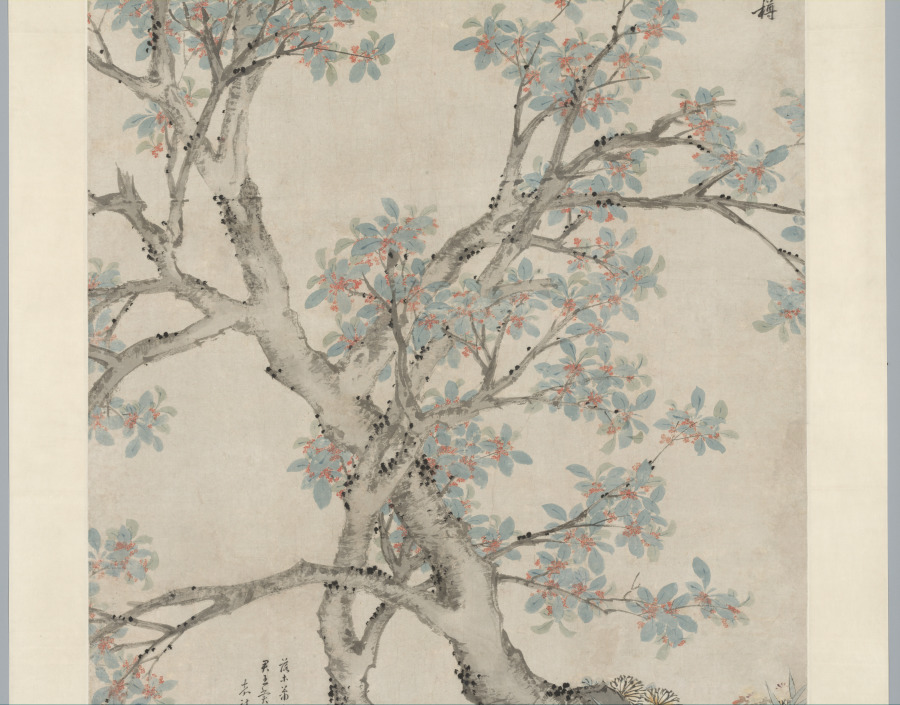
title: Yellow Chrysanthemums and Red Osmanthus in the Style of Wang Yuan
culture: China, Ming dynasty (1368–1644)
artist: Shen Zhou (Chinese, 1427–1509)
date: 1468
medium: hanging scroll, ink on paper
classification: Painting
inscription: Artist's inscription, signature, and 2 seals at upper right: Beneath the fence yellow [chrysanthemum] flowers brave the rain to blossom;/ Still others lean on the red osmanthus tree and dazzle the deep green moss./ With a goblet [of wine] I face them, entirely without concern;/ Who will answer the knocking at the gate where a guest has arrived? In the ninth month of the fourth year of the Chenghua era [1468], I followed the brush-conception of Wang Danxuan 王澹軒 [Wang Yuan 王淵] at the Youzhuzhuang 有竹庄 [House with Bamboo]. Inscribed and [painted] by Shen Zhou 沈周 of Changzhou 長洲. [seals] Shitian 石田; Shen shi Qinan 沈氏启南. trans. HR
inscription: 1 additional inscription, dated 1523, and 2 seals of Wang Chong 王寵 (1494-1533).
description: Shen Zhou, a native from Suzhou, was descended from a prominent land-owning family with strong ties to literati culture. Because Shen Zhou never entered government service, he had ample opportunity to cultivate the arts of painting, poetry, and calligraphy. Chrysanthemums and red osmanthus both bloom in autumn. The deep orange osmanthus flowers emanate a characteristically sweet fragrance. According to his inscription on the painting, Shen Zhou sought to imitate the style of the Yuan dynasty (1271–1368) painter Wang Yuan. His color-filled brushstrokes and washes, however, anticipate the flower painting style of Yun Shouping, whose Peonies are also in the Cleveland Museum of Art collection, https://www.clevelandart.org/art/1967.192. The sheer size and complex composition of this scroll are impressive.